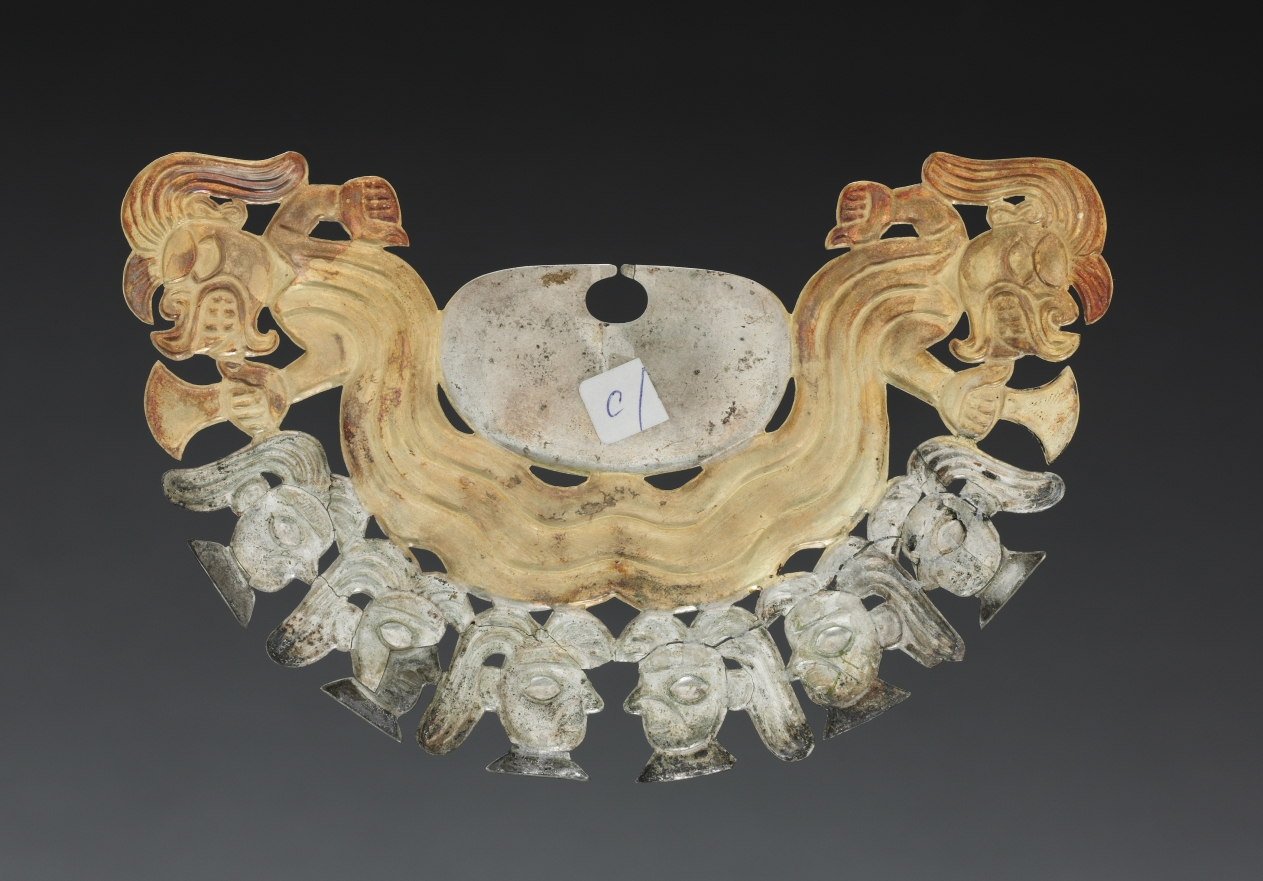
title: Nose Ornament with Decapitators and Human Heads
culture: Peru, North Coast, Moche culture (50–800 CE), early Intermediate Period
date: c. 100–300 CE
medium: gold alloy and silver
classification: Metalwork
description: A crucial element of Moche royal regalia was the nose ornament, whose imagery varies from benign to predatory. One ornament here depicts a human head, perhaps a ruler’s portrait, flanked by birds that attack human victims. In another, two supernatural decapitators brandish knives over a row of severed human heads. The third is an elegant composition that combines serpents with long-necked water birds. The Moche were among the Andes’ most inventive metalsmiths, and they developed many complex techniques for joining and enriching the surfaces of metals, which they usually worked by hammering rather than casting. The gold-and-silver ornaments were made by first joining gold and silver sheets through heating and hammering. Then came the relief decoration, followed by the selective removal of metal along the joins. Finally, the ornament was trimmed and polished.